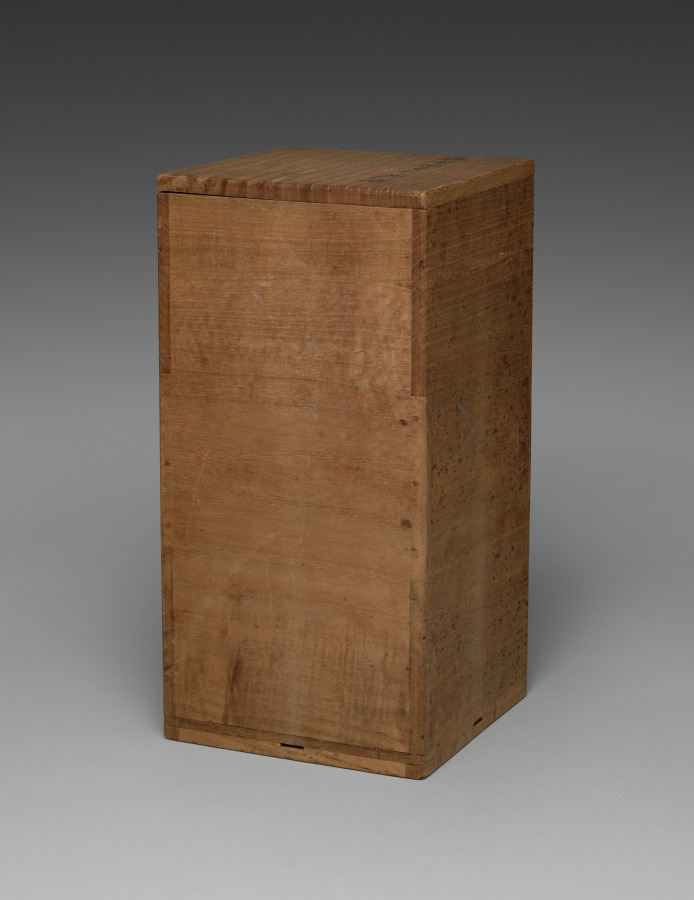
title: Gu-Shaped Vase with Patina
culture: Japan, Taishō period (1912–26) or Shōwa period (1926–89)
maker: Seifū Yohei IV (Japanese, 1872–1951)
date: 1914–46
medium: Porcelain with overglaze color enamel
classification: Ceramic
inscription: 清風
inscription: 成山清風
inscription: 清風造 【印】 清風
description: Yohei IV’s interest in bold, colorful designs is on full display in this purple gu-shaped vase. He not only exhibits his penchant for bold colors but also shows off a complex surface that suggests the patina on an ancient bronze. The body of the vase is a dark, greenish blue over which there is a thick application of color. While the predominant overlaid color is lavender purple, salmon pink and cornflower blue appear in places along with myriad nearly black forms, perhaps floating dandelion seeds or tiny flowers, scattered over the surface.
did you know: The glaze recalls in some respects a Chinese glaze named “snowflake blue,” or xuehualan (Japanese sekka’ai), a low-fired lead-fluxed glaze.